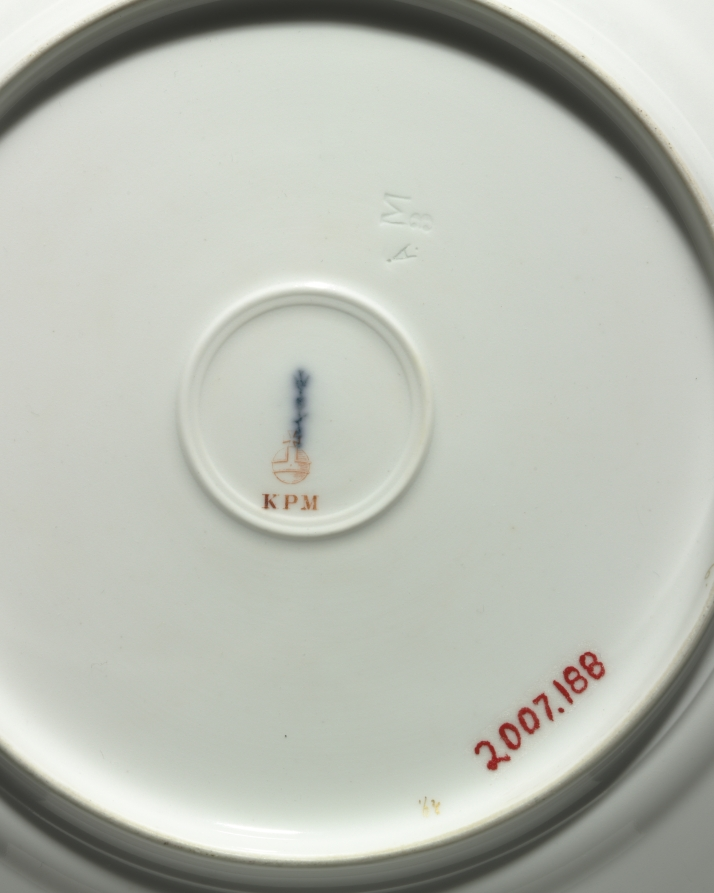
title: Plate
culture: Germany, 20th century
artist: KPM (Königliche Porzellan-Manufaktur) (German, Berlin, est. 1763)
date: 1901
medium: porcelain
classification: Ceramic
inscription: KMP" and a globe with a cross over it in red fired on overglaze enamel inside the support ring on the base.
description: Manufactured by the Royal Porcelain Factory in Berlin, this plate is decorated with elegant gilding around the perimeter and yellow flowers with green leaves.